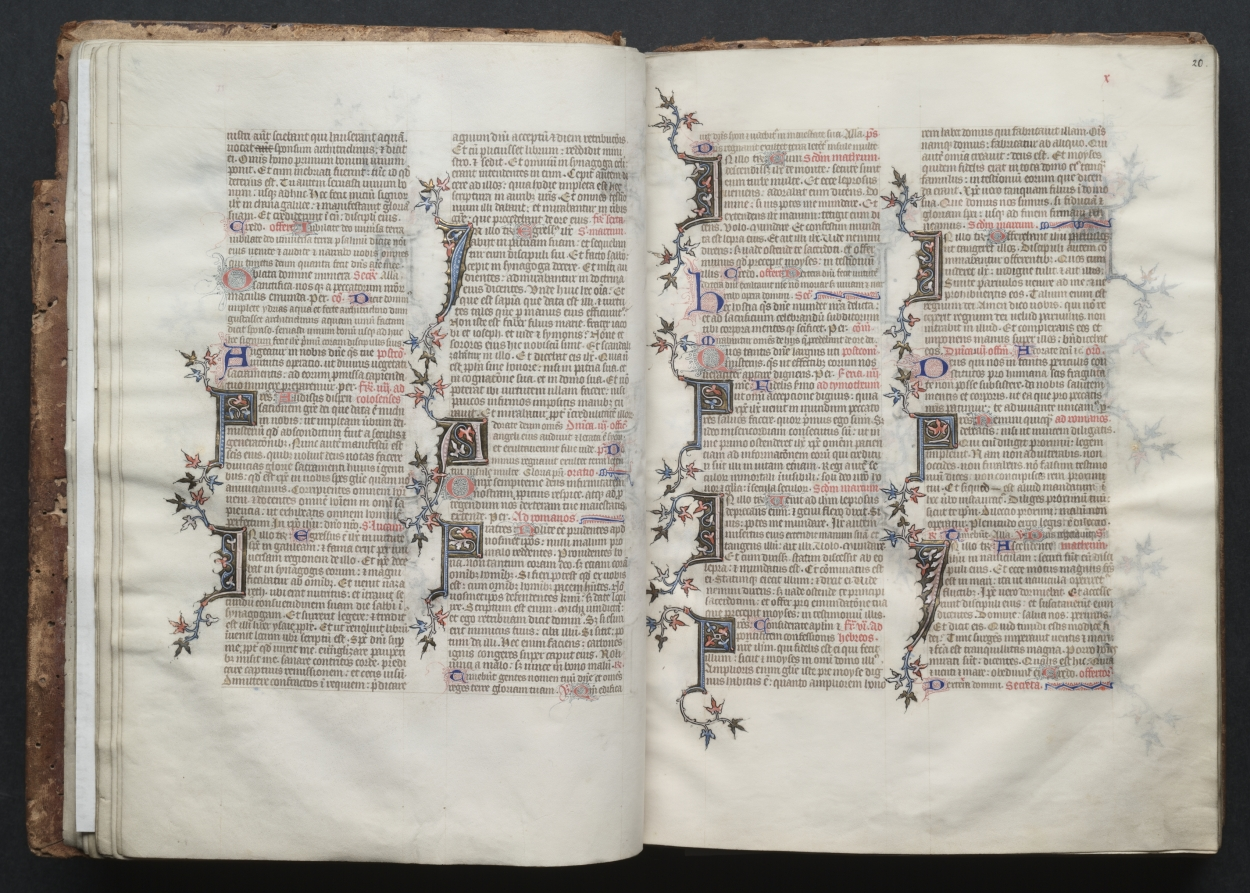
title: The Gotha Missal: Fol. 19v, Text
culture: France, Paris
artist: Master of the Boqueteaux (French)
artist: and Workshop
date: c. 1375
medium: ink, tempera, and gold on vellum; blind-tooled leather binding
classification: Bound Volume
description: The style and quality of this manuscript's decoration is typical of deluxe Parisian books made for aristocratic or royal patrons. Most of the book's decoration appears to be the work of the Master of the Boqueteaux, an artist active at the court of King Charles V (died 1380). His style was apparently shared by a number of book illuminators working in and around Paris. It is very possible that the Gotha Missal belonged to Charles V, but is not provable because the manuscript has no royal portraits and lacks a colophon. Given the book's magnificent decoration, however, it would seem that it was produced for a Valois prince, if not for the king himself. The manuscript receives its name from the German dukes of Gotha, its later owners.